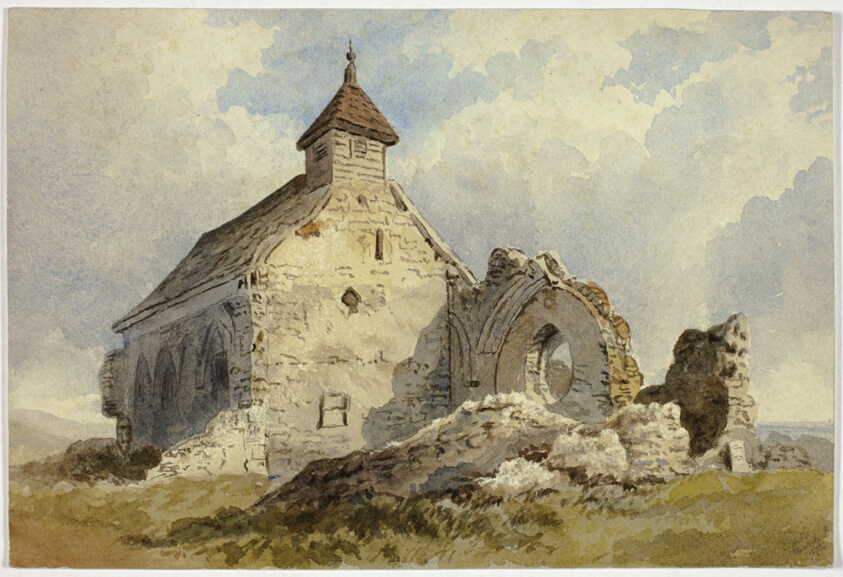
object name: Drawing and Watercolor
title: Chapel Ruins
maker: Charles John Hills (English, active 18th-19th centuries)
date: 1872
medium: Watercolor, over traces of graphite, on ivory wove paper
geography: England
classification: watercolor; drawings (visual works); prints and drawing